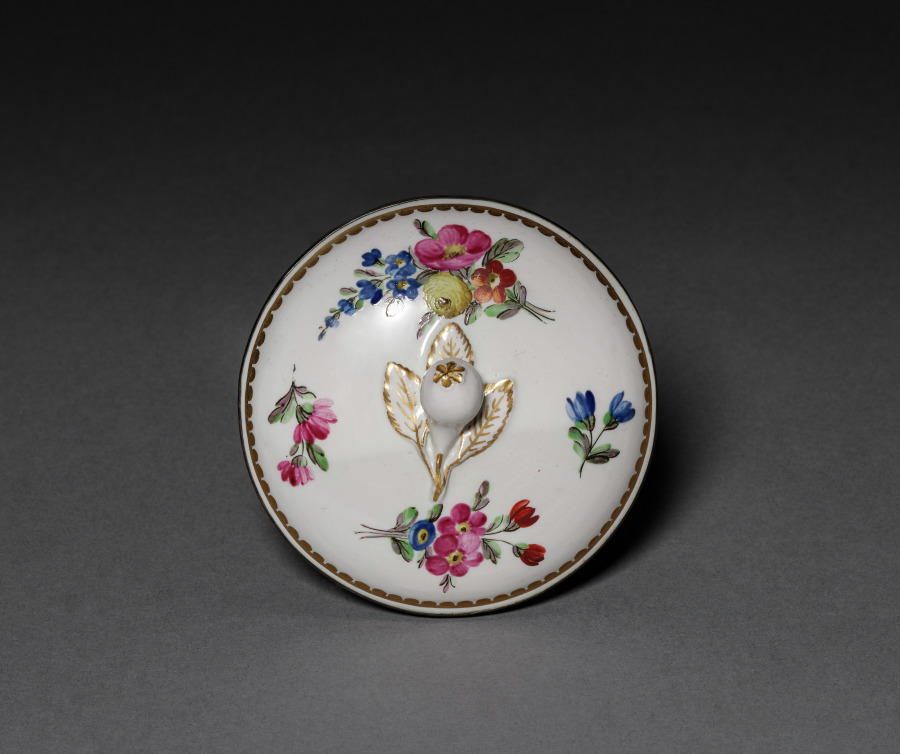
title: Lid for a Jar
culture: France, 18th century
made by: Faubourg Saint-Denis (French)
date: c. 1775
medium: porcelain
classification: Ceramic